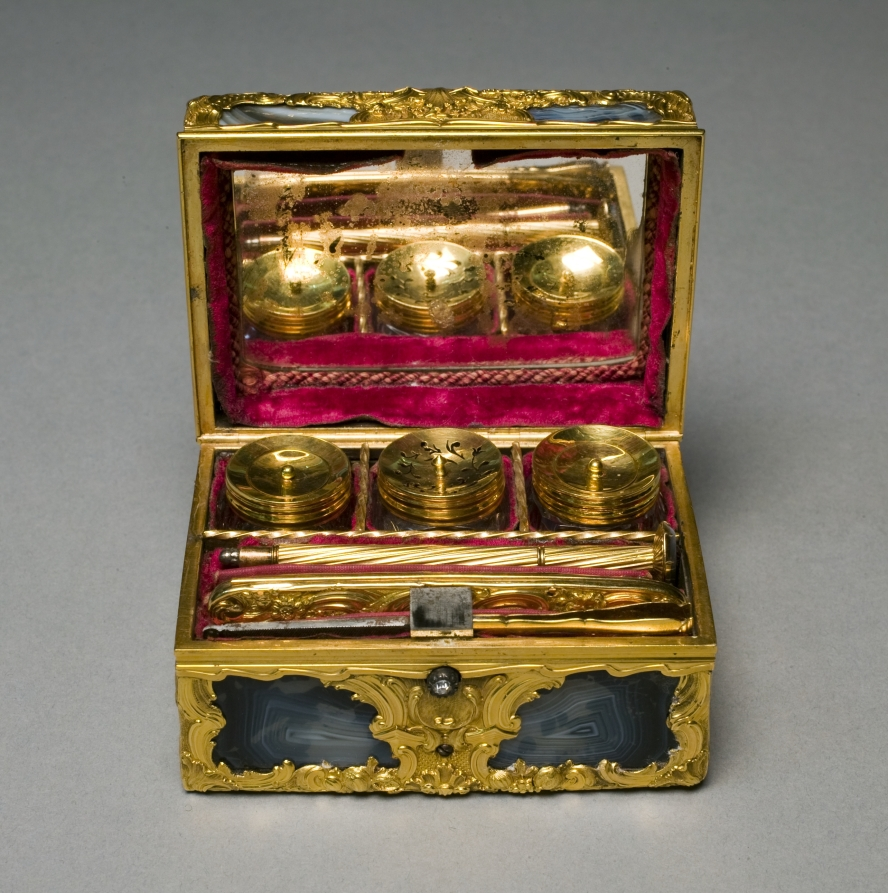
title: Vanity Case (Nécessaire)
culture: England, mid 18th century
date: c. 1760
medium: gold, agate, interior fitted with gold-mounted implements, mirror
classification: Miscellaneous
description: Luxurious personal objects were an essential part of a privileged wardrobe during the 1700s and early 1800s, emphasizing their owner’s refinement and wealth. Jewelry, miniatures, and nécessaires—small expensive sets designed to hold grooming, writing, and sewing tools—were often given as intimate gifts, intended to be seen and admired. Their glittering surfaces, however, disguised a system based on the labor and suffering of enslaved or indentured people, whether in gold and stone mines or shops where these goods were made.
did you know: This small box contains gold-mounted writing instruments, including three ink wells, a fountain pen, a clasp knife, and tweezers.